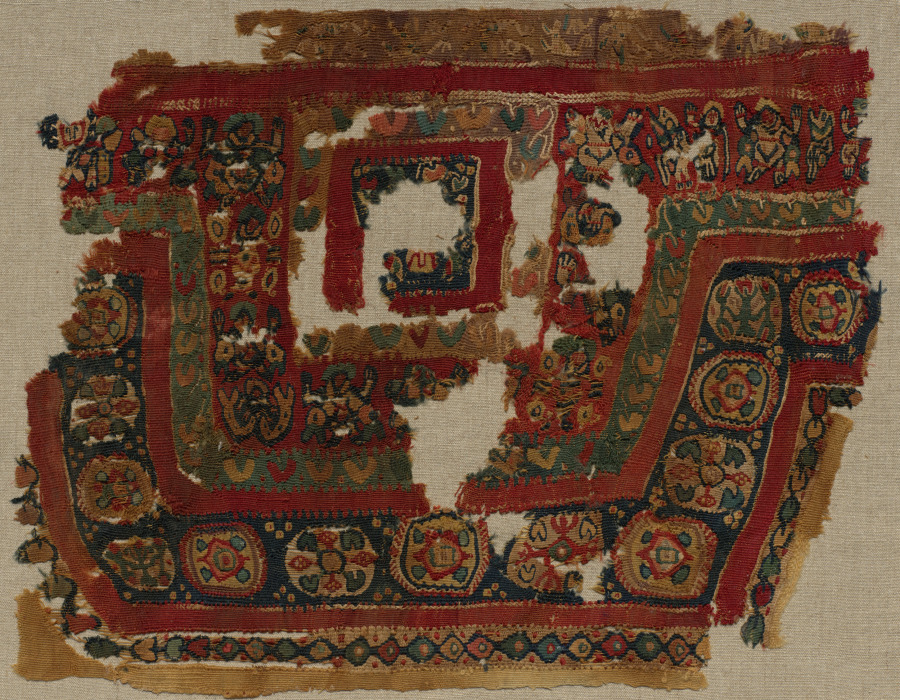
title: Fragment, Part of the Neck Ornament of a Tunic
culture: Egypt, Byzantine period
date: 400s - 600s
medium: tabby weave, inwoven tapestry ornament; wool and linen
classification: Textile